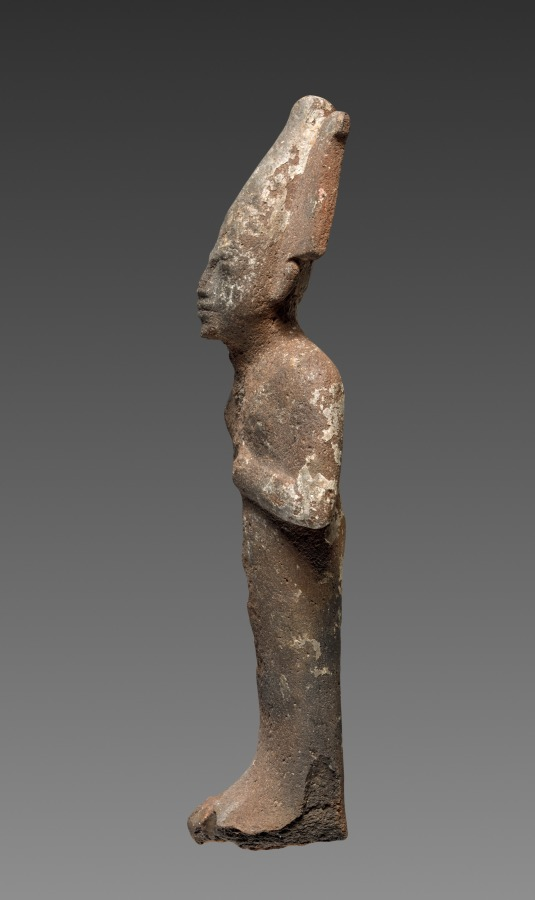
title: Statuette of Osiris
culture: Egypt, New Kingdom (1540–1069 BCE), Dynasties 19–20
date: 1295–1069 BCE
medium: painted terracotta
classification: Funerary Equipment